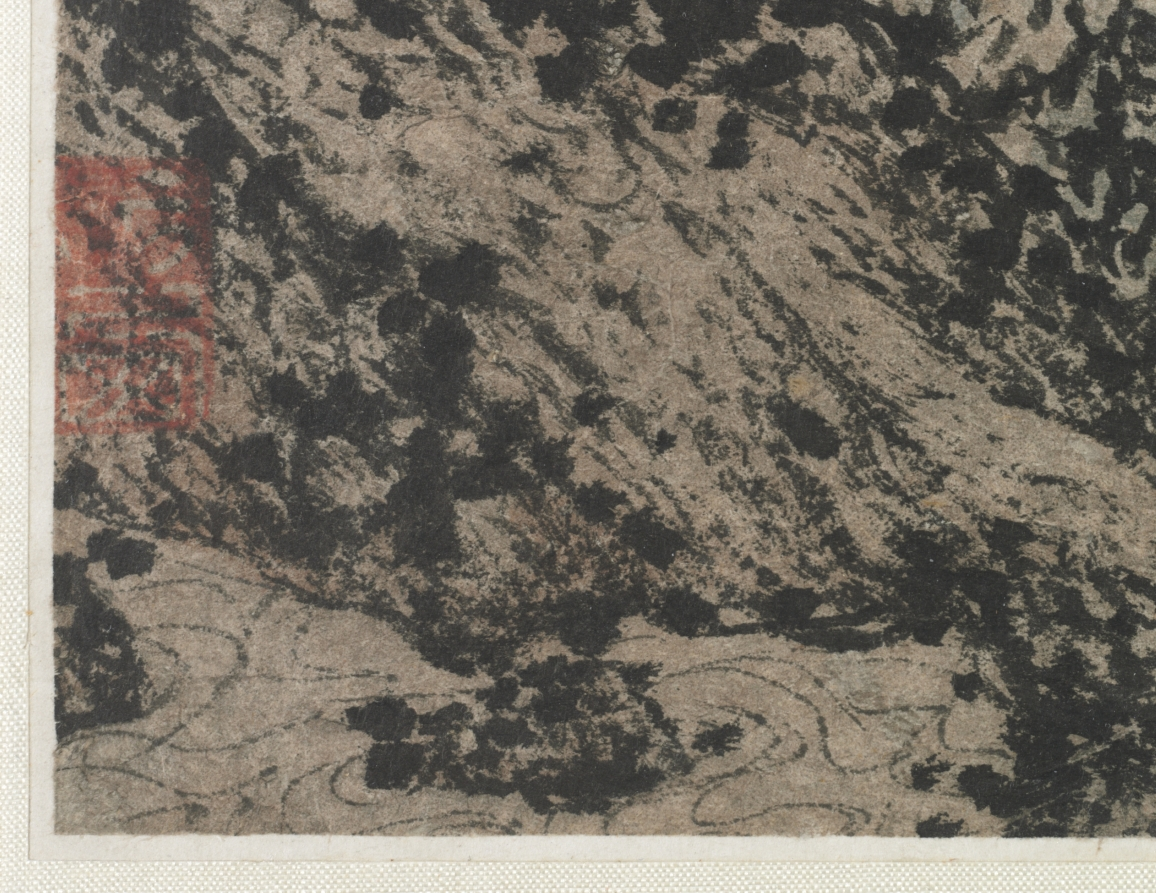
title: Writing Books under the Pine Trees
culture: China, Yuan dynasty (1271-1368)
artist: Wang Meng (Chinese, c. 1308–1385)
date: c. 1308–85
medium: Album leaf; ink and color on paper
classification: Painting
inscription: Artist's inscription, signature, and seal: Many years and months passed by the locked gate/ Behind which the scholar has been immersed in writing his books;/ While the pine trees he had planted/ Have all grown up with old dragon scales./ The Yellow Crane Mountain Woodcutter [Huang-ho-shan-ch'iao] painted this for Chen-su [the hao of Ts'ao Chih-po]. [seal] Wang Meng yin.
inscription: 2 additional seals: 1 of Ts'ao Chih-po (1271–1355); 1 unidentified.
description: Wang Meng, born into a distinguished family in Wuxing (modern Huzhou), Zhejiang province, was the maternal grandson of Zhao Mengfu (1254–1322). Aside from intermittent political commitments under the foreign Mongol and Ming governments, Wang dedicated most of his life to retirement, as conveyed in this painting. By the 1360s, when the Red Turbans began to rebel against the Yuan dynasty leaders, and the Mongols gradually lost control over Jiangnan, Wang Meng withdrew into the mountains north of Hangzhou, calling himself Woodcutter of Yellow Crane Mountain. In the early years of the Ming dynasty, Wang was caught up in a purge and died in prison.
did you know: Wang Meng wrote the inscription at the right in classical seal script and applied his signature and seal on the left side of the composition.